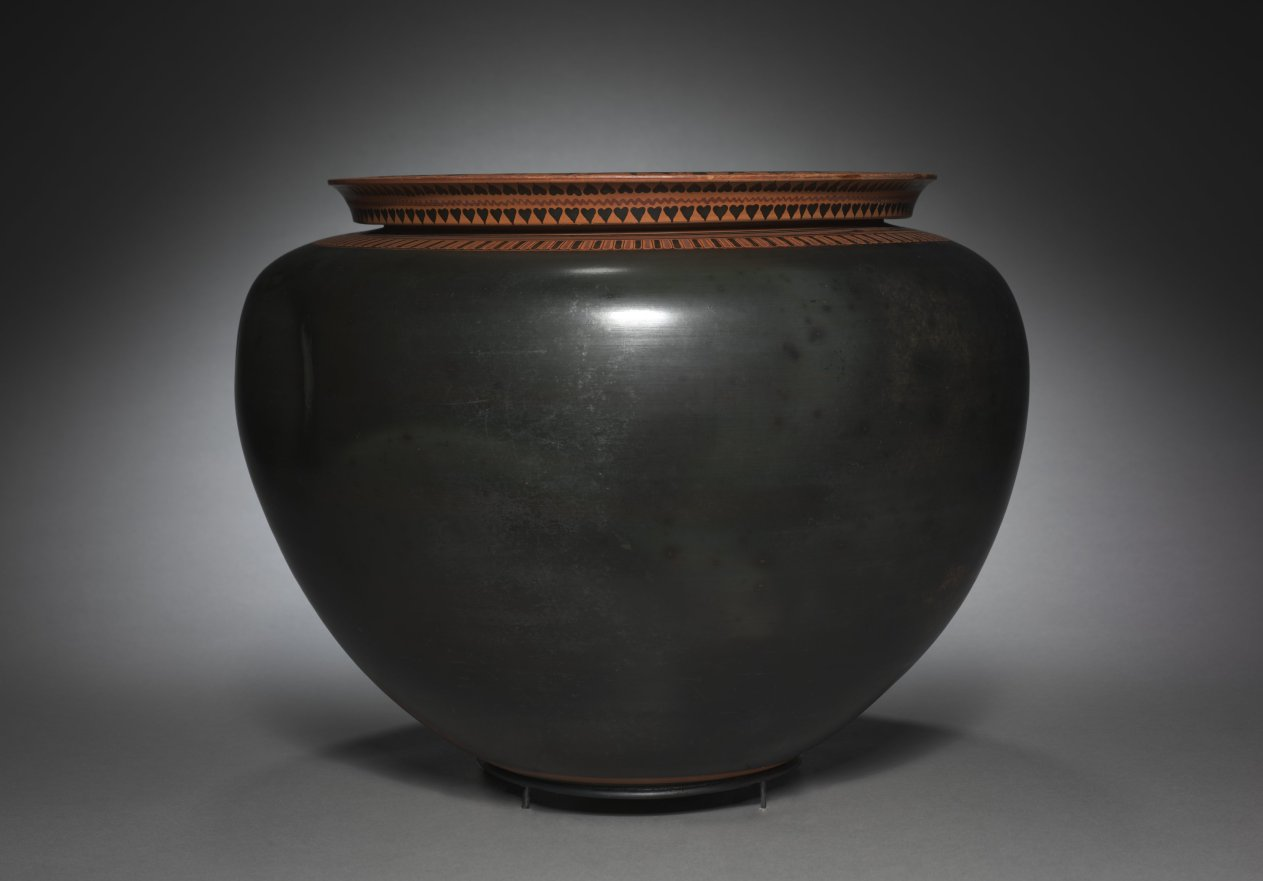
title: Black-Figure Dinos (Mixing Vessel): Warships (Int.); Heroic Scenes (Top)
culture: Greek, Attic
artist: circle of Antimenes Painter (Greek, Attic, active c. 530–510 BCE)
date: c. 520–515 BCE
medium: ceramic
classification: Ceramic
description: Designed for use at a symposium, or drinking party, this large dinos has a wide mouth allowing easy access to its contents—wine mixed with water (and sometimes other ingredients for flavoring). While drinking, symposiasts would often recite poetry and celebrate the mythological exploits of gods and heroes, perhaps prompted by the images painted on their pottery. Here, the vase-painter clearly anticipated such use; when the vessel was full, the ships painted on the inside of the rim would appear to sail across the “wine-dark sea” (to borrow a phrase found frequently in Homer’s Iliad and Odyssey). Other heroic scenes, including Herakles wrestling the Nemean lion and Theseus battling the Minotaur, appear on top of the rim, interspersed with chariots and anonymous combats.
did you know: Unable to stand on its own, this round-bottomed vessel probably once had a separately made base.